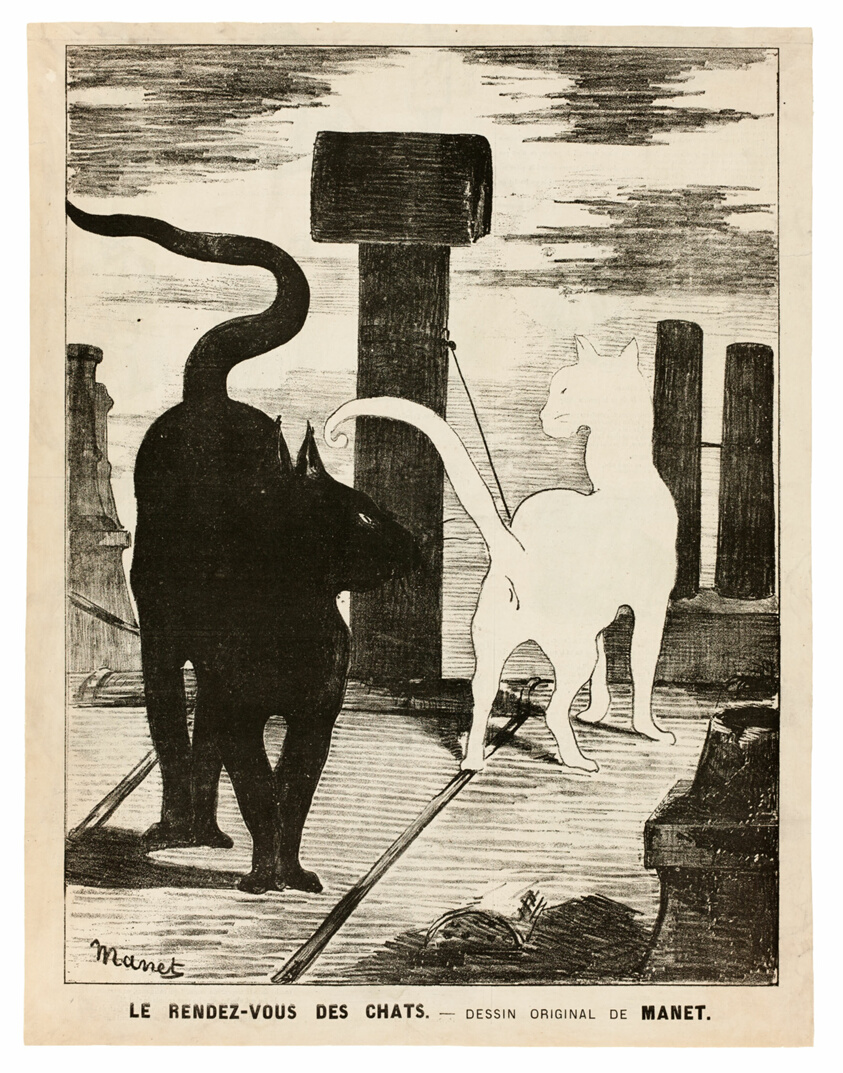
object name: Print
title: The Cats' Rendezvous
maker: Édouard Manet (French, 1832-1883)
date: 1868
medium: Lithograph in black on ivory wove paper, laid down on ivory cloth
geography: France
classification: reproduction; print; prints and drawing